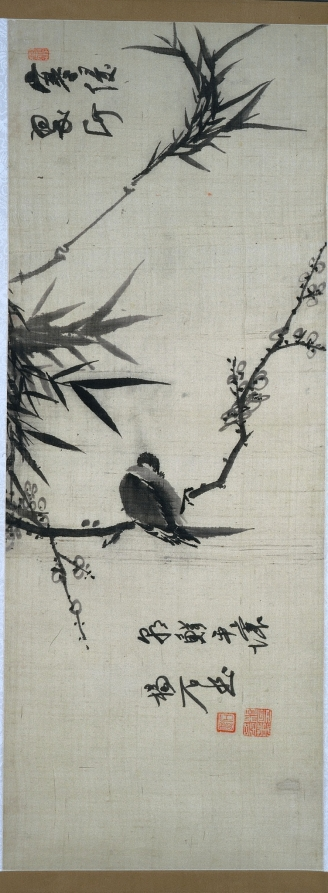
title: Bird Sleeping on a Plum Tree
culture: Korea, Joseon dynasty (1392–1910)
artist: Yang Ki-hun (Seuk-Eun) (Korean, 1843–1919?)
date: early 1900s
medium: hanging scroll, ink on silk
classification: Painting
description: The plum’s status as the orthodox symbol of the literati’s pure spirit originated in Lin Bu’s poem "Tiny Plum Flowers in Mountain Garden." The plum was also widely depicted in Korean paintings as part of the Four Gentlemen—or Four Gracious Plants—motif. Here, the plum and bamboo express literati spirituality while the bird with its head pointing downward indicates the artist’s feelings about the unstable situation at the end of the Joseon period. Yang Ki-hun was a Korean scholar-official renowned for painting and calligraphy. King Gojong (reigned 1863–1907) was one of Yang's prominent patrons.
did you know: Yang Ki-hun was one of the most commercially successful painters active in the late 19th century.